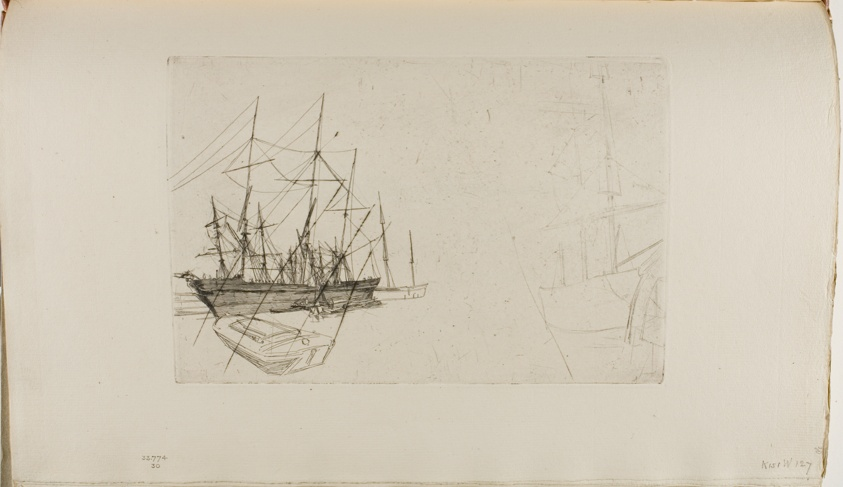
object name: Print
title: A Sketch of Shipping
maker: James McNeill Whistler (American, 1834-1903)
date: 1859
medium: Etching and drypoint with foul biting, with drypoint cancellation, in black ink on ivory wove paper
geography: United States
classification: etching; prints and drawing; book; foul biting; drypoint; print; paper